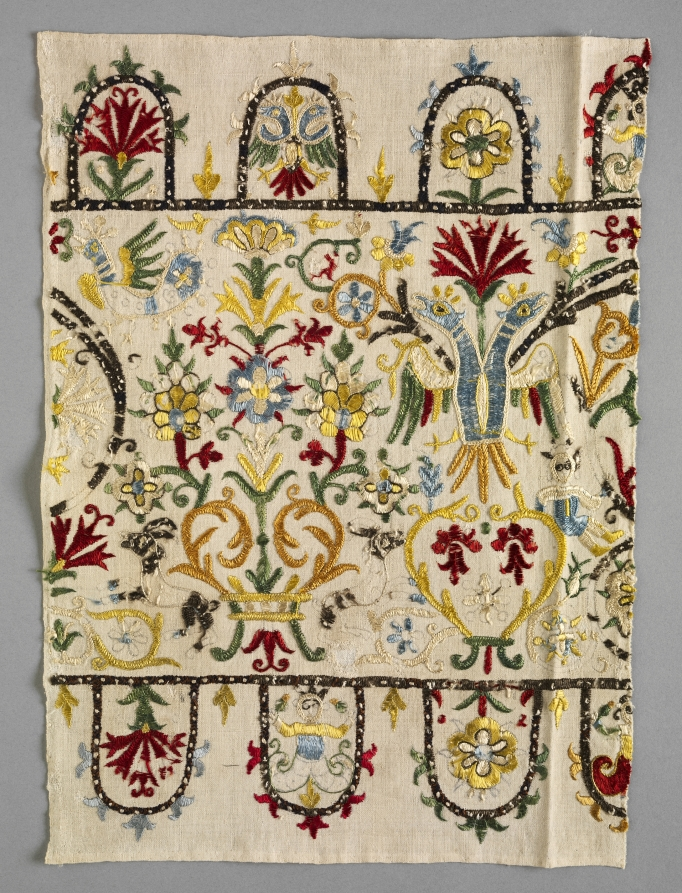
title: Border Strip of a Skirt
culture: Greece, Crete, 17th-18th century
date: 1600s - 1700s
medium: embroidery: silk on linen tabby ground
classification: Embroidery